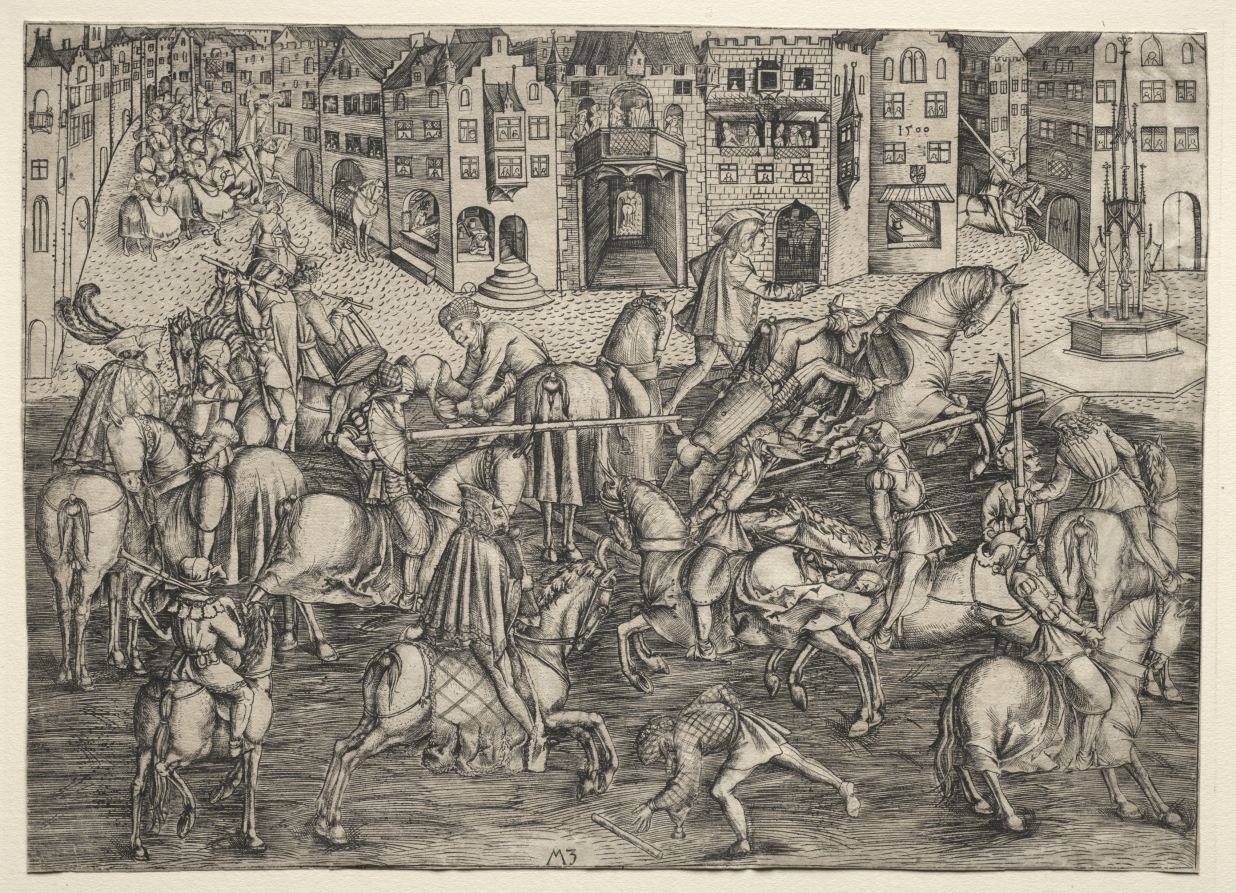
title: The Great Tournament: Munich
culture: Germany, early 16th Century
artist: Master MZ (German)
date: 1500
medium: engraving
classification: Print